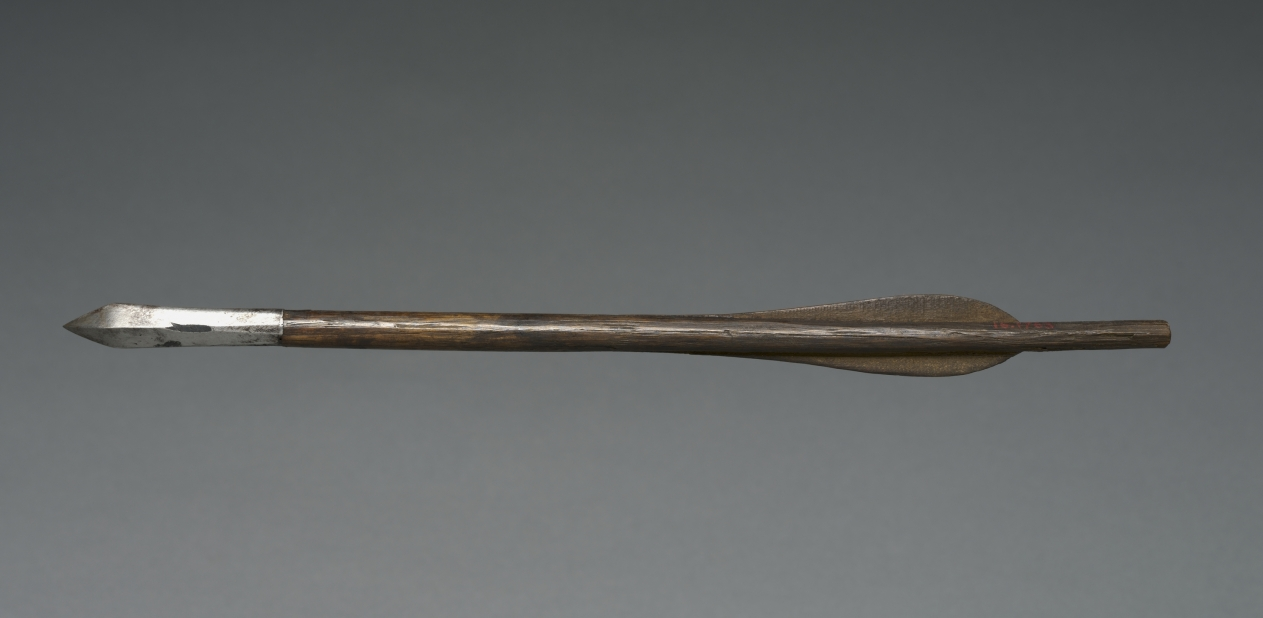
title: Crossbow Bolt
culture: Germany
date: 1500s–1600s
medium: wood, leather, steel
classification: Arms and Armor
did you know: Bolts with leather feathering were used mainly in the Tyrolean area, which includes northern Italy and western Austria.